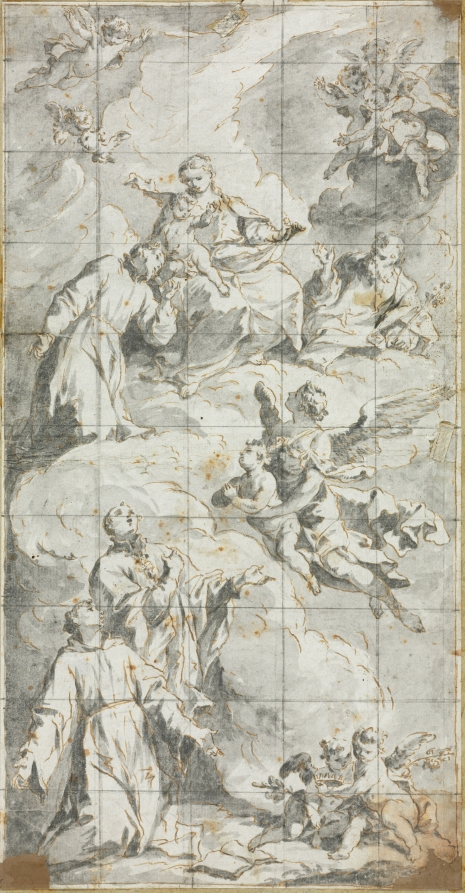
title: Apotheosis of the Virgin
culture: Austria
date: 1600s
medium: pen and brown ink and gray wash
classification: Drawing